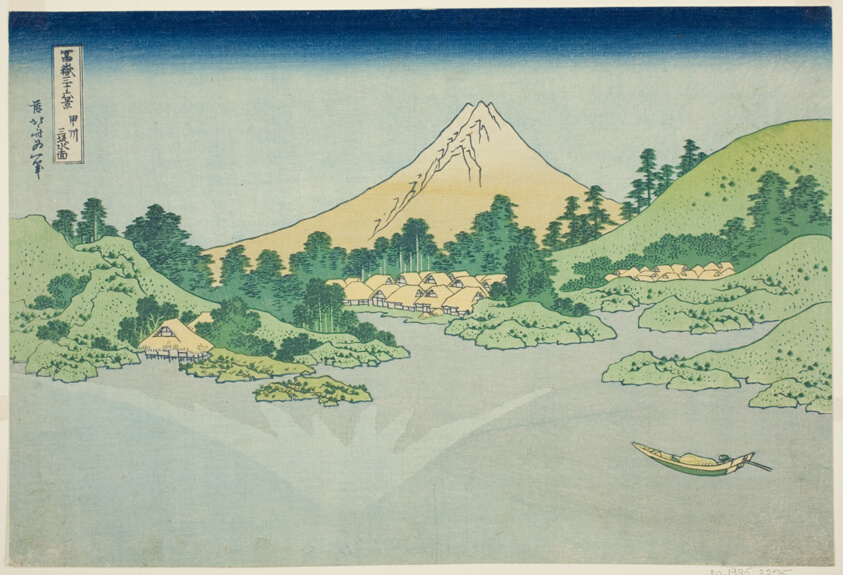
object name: Print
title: The Surface of the Water at Misaka in Koshu Province (Koshu Misaka suimen), from the series "Thirty-six Views of Mount Fuji (Fugaku sanjurokkei)"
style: Japanese (culture or style)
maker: Katsushika Hokusai 葛飾 北斎; Japanese, 1760-1849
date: c. 1830/33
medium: Color woodblock print; oban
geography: Japan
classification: woodblock print; print; asian art